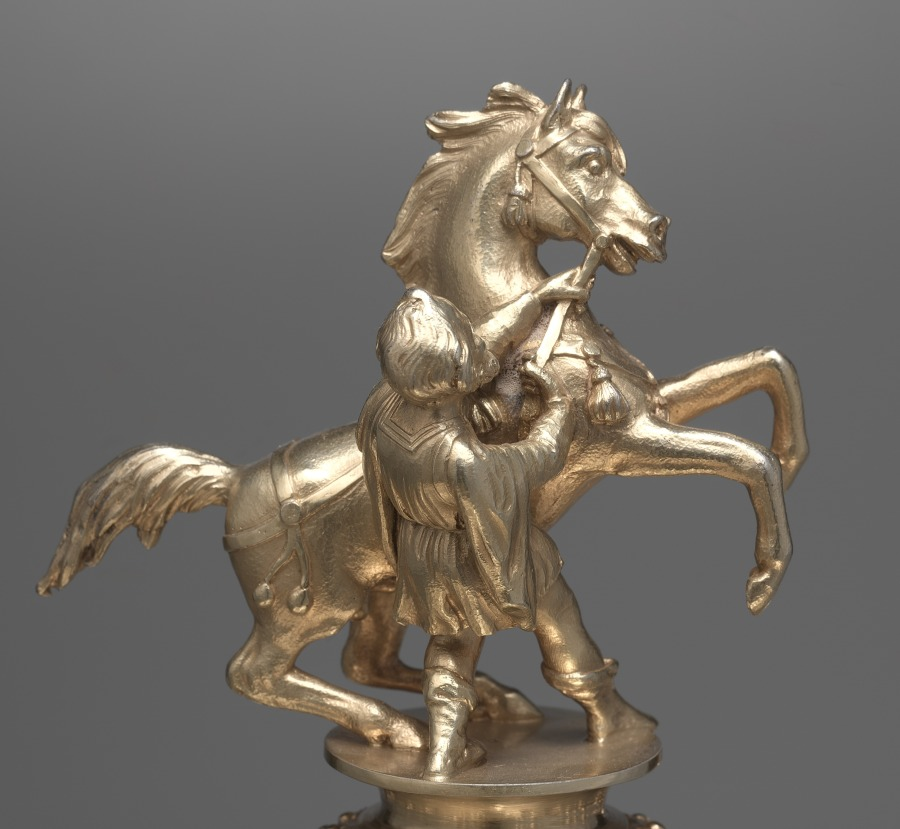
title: Centerpiece (lid)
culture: France, 19th century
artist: Charles-Nicolas Odiot (French, 1826–1868)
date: 1838–1848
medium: silver gilt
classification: Metalwork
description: Made for Louis Philippe (1773-1850), King of France 1830-48.